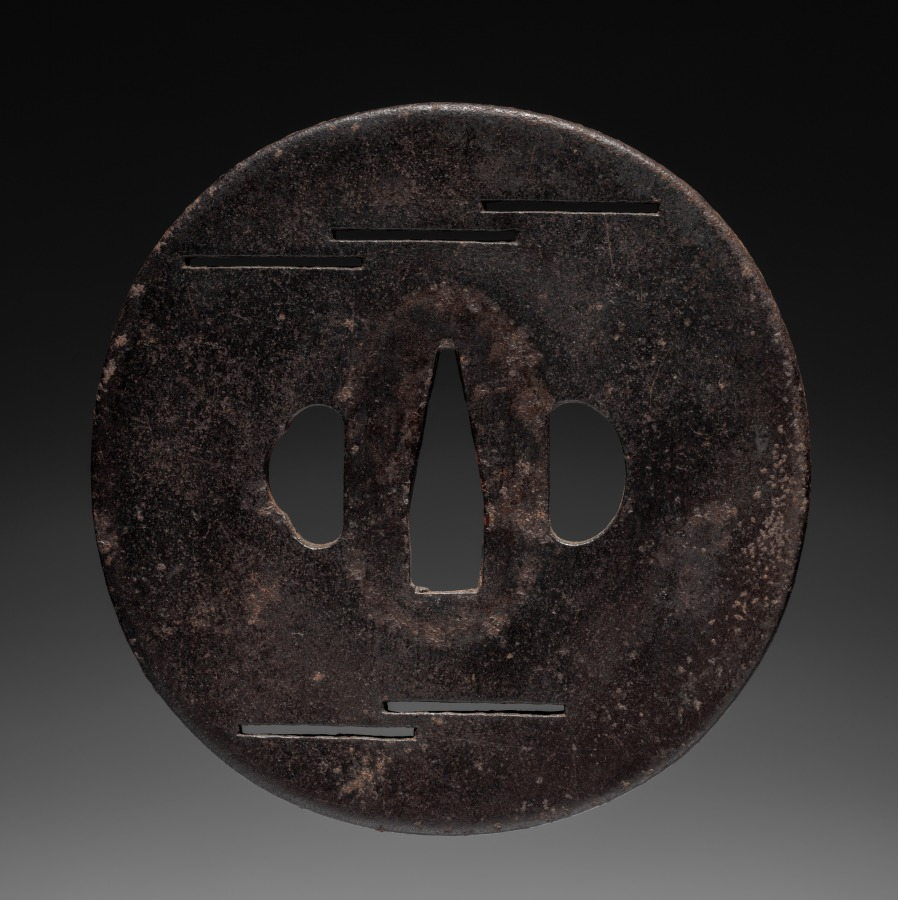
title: Sword Guard (Tsuba)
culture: Japan, possibly Edo period (1615-1868)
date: c. 1615–1868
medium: iron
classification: Arms and Armor